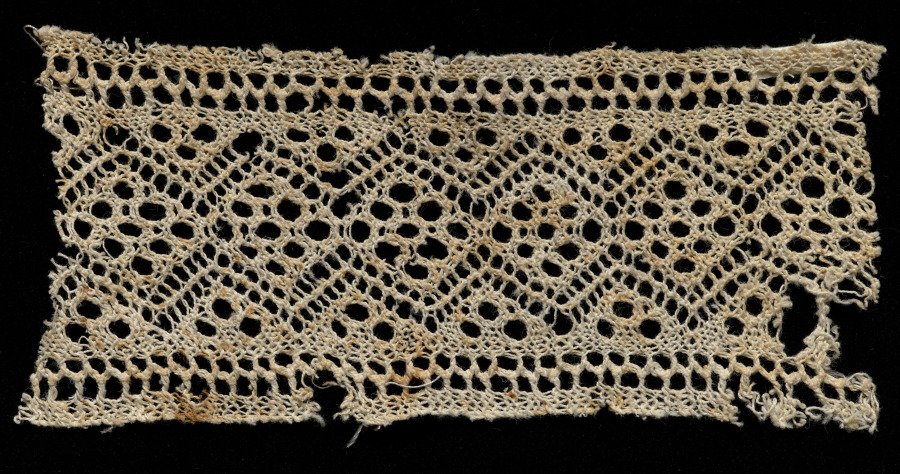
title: Lace Edging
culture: Spain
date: 1700s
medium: Knit lace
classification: Lace